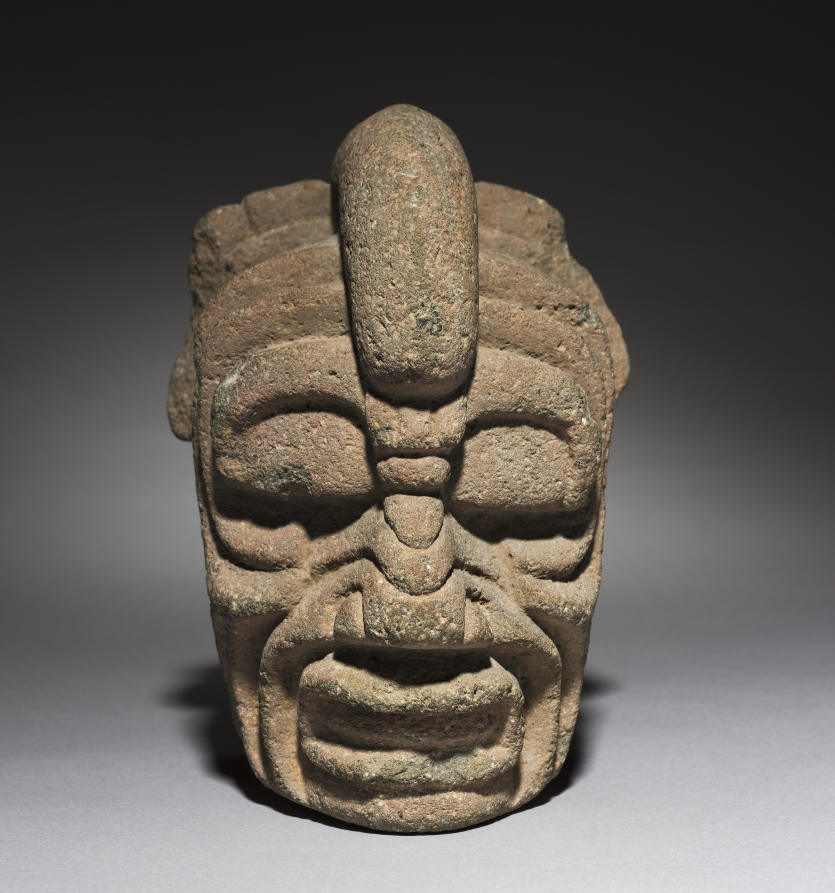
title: Ballgame Stone Head (Hacha)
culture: Mesoamerica, Classic Veracruz style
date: 450–550 CE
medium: gray volcanic stone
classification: Sculpture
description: Little can be said about this head’s identity and meaning, although the deep, dramatic furrows that line the face suggest age and the crest that curves across the top of the head has been compared to that of a bird. Such heads were one element of the regalia used in an ancient ballgame associated with complex mythology and equally elaborate art production on Mexico’s Gulf Coast, in present-day Veracruz.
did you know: This head’s identity is unknown but the deep furrows on the face suggest age.